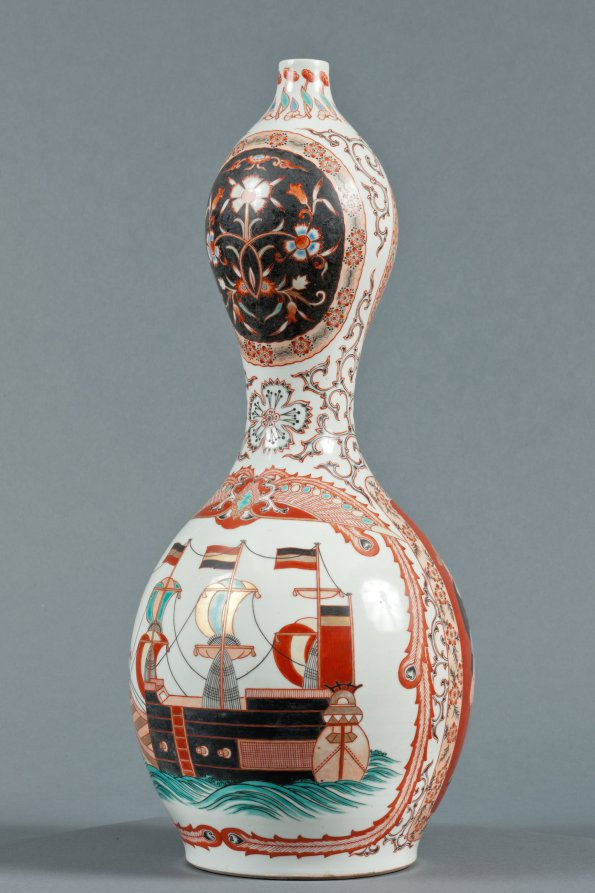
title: Bottle with Western Ships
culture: Japan, Edo period (1615–1868)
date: c. 1800–1868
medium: Porcelain with decoration in colored enamels and underglaze blue, overglaze enamels, and gold (Hizen ware, Arita type)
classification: Ceramic